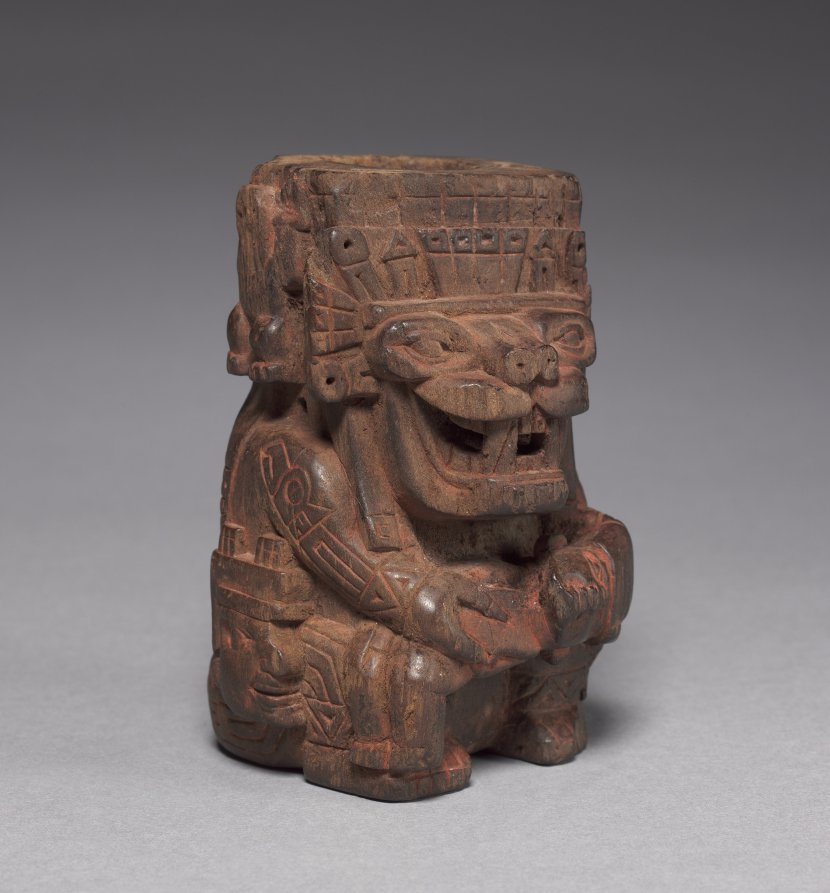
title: Sacrificer Container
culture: Central Andes, Wari style (600-1000)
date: 770–890 (radiocarbon date, 95% probability)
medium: wood and cinnabar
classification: Wood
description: This container assumes the shape of a magnificent, feline-headed, supernatural sacrificer who draws a knife across the throat of the human it holds in its lap. Severed human heads hang from the feline's belt and dangle by the trachea at the back of its headdress. Sacrifice had a place in Wari religious practice, probably as an unusual and exceptionally precious offering made to entice the benevolence of cosmic forces. Indeed, colonial-period Andean people believed that death was a prerequisite for the renewal of the world.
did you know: Traces of cinnabar, a toxic mercuric sulfide, are visible on the container's surface.